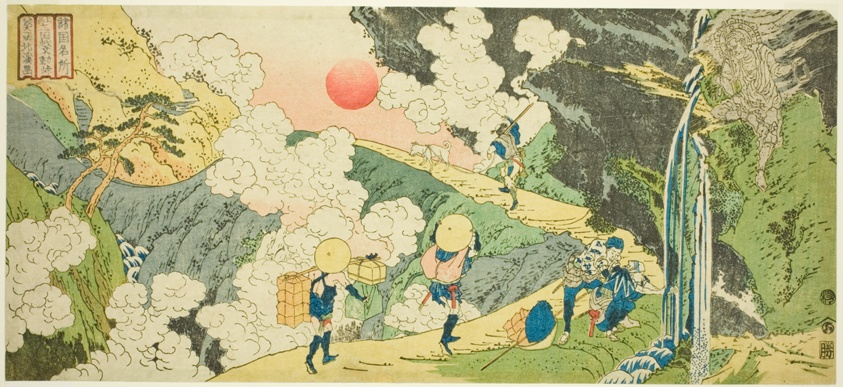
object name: Print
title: Fudo Pass on the Mikuni Road in Kozuke Province (Joshu Mikuni goe Fudo toge), from the series "Famous Places in the Provinces (Shokoku meisho)"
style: Japanese (culture or style)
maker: Totoya Hokkei (Japanese, 1780–1850)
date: c. 1830/34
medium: Color woodblock print; horizontal otanzaku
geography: Japan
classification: woodblock print; print; asian art